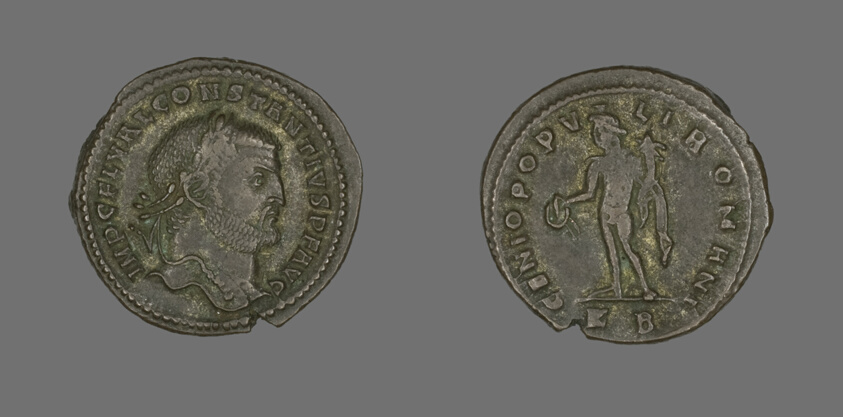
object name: Coin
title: Coin Portraying Emperor Constantius I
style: roman (ancient, style or period), ancient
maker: Roman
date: 305-306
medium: Bronze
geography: Roman Empire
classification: coin; ancient art